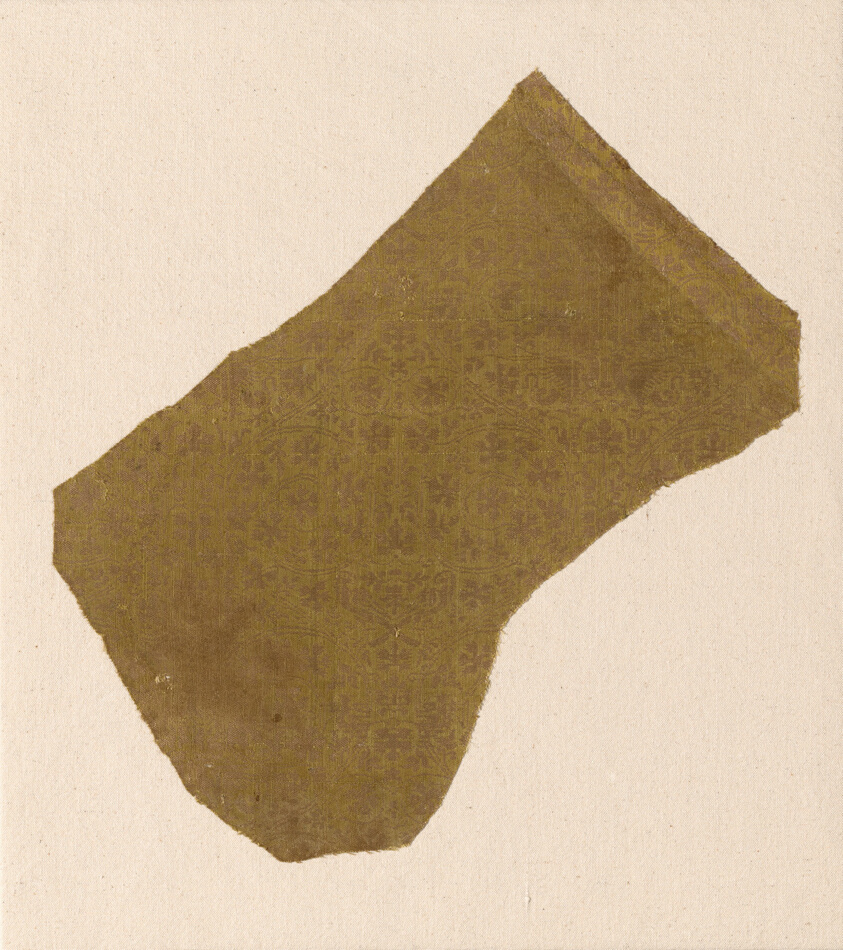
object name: Textile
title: Fragment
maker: Italy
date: 1325/75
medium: Silk, plain weave with plain interlacings of secondary binding warps and supplementary patterning wefts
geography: Italy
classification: textile; weaving